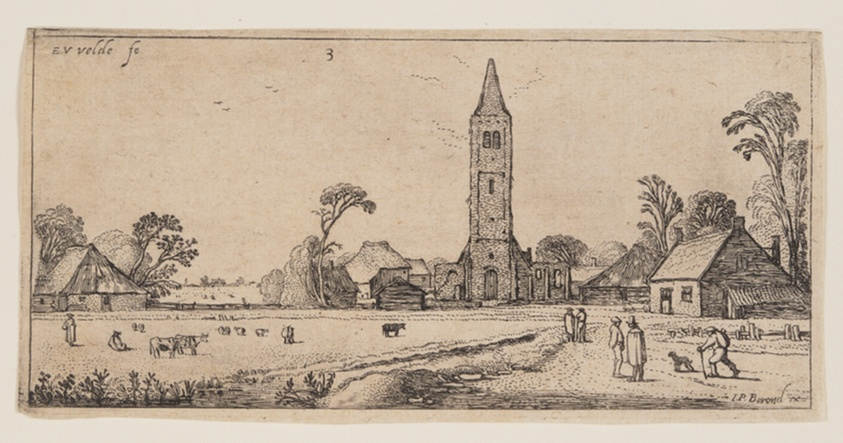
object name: Print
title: Path at Right Leading to a Village, from Landscapes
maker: Esaias van de Velde; Dutch, 1587–1630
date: c. 1610-1630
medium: Etching on ivory laid paper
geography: Netherlands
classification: etching; paper; print; prints and drawing